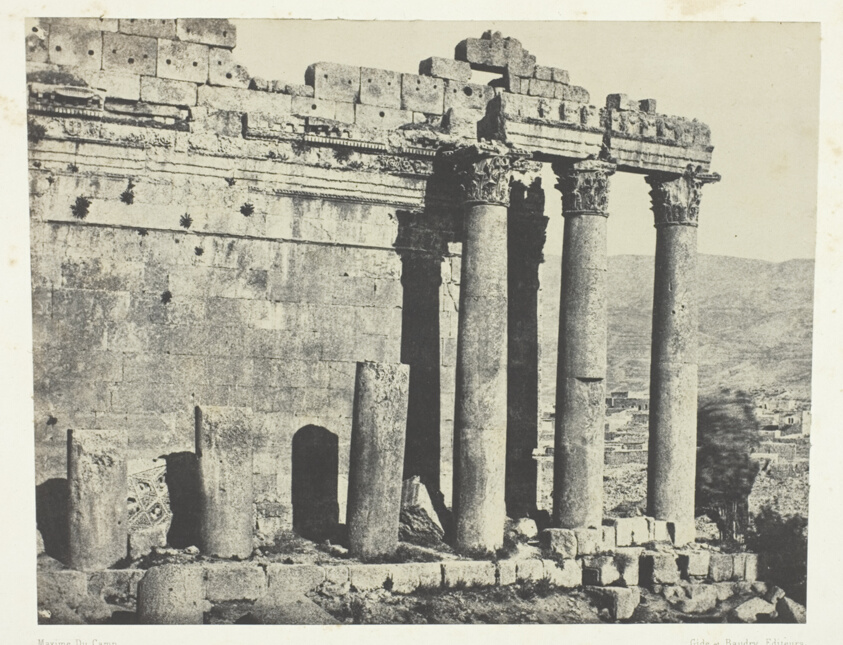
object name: Photograph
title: Baalbeck (Héliopolis), Temple Du Jupiter, Façade Occidentale; Syrie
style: 19th century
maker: Maxime Du Camp (French, 1822–1894)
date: 1849/51, printed 1852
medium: Salted paper print, plate 124 from the album "Egypte, Nubie, Palestine et Syrie" (1852)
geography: Syria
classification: salted paper print; photographic process; photography; photograph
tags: Collected by Hugh Edwards, Egypte, Nubie, Palestine et Syrie